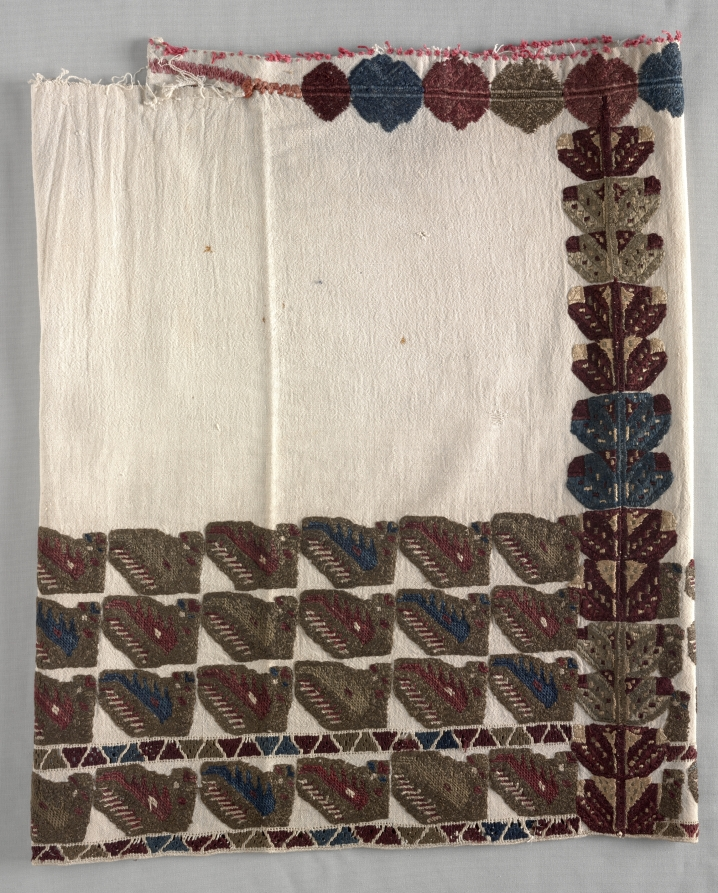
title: Sleeve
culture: Greece, Dodecanese Islands, 18th century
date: 1700s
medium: embroidery: silk on cotton tabby ground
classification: Embroidery